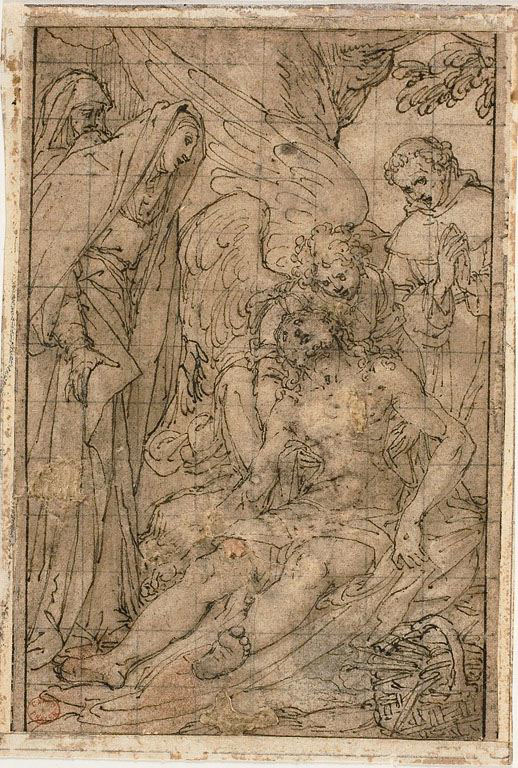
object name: Drawing and Watercolor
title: Pietà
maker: Giovanni Battista Castello, called Il Bergamasco; Italian, c. 1509-1569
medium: Pen and brown ink with brush and brown wash, on tan laid paper, squared in graphite, laid down on ivory laid paper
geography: Italy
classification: ink with wash; drawings (visual works); prints and drawing